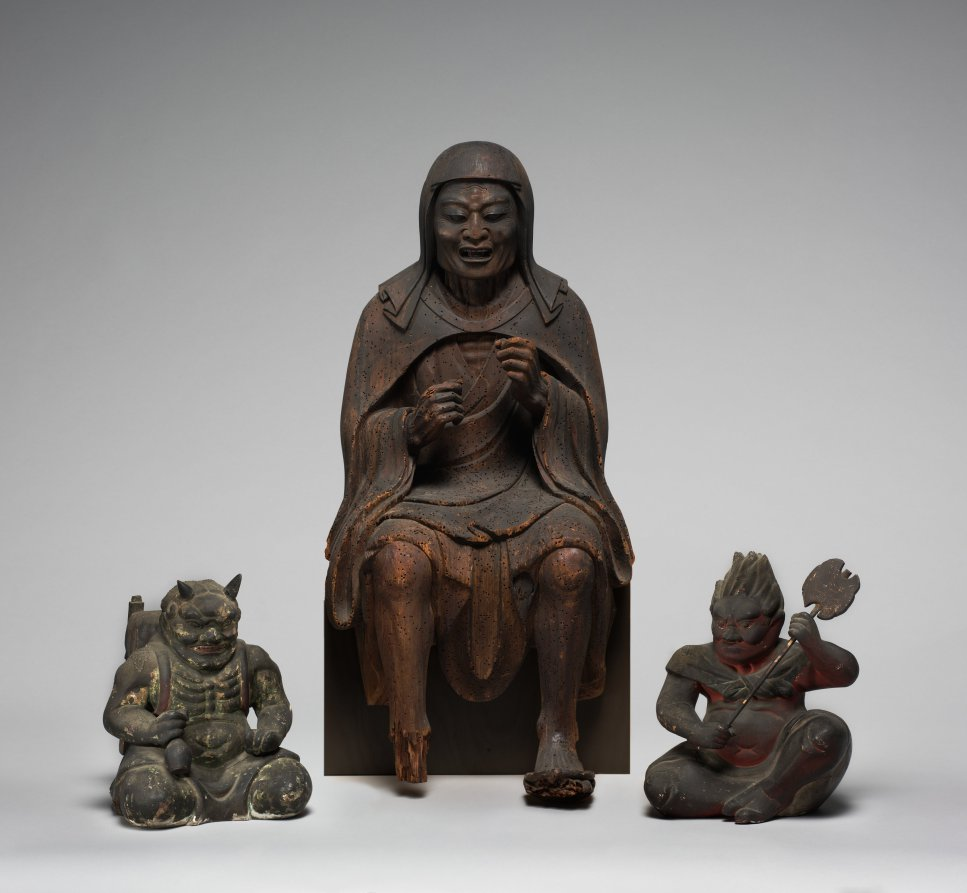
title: Seated Zenki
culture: Japan, Muromachi period (1392–1573)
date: 1400s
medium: wood with pigment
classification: Sculpture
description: The axe-wielding red Zenki, and the vase-holding, bamboo backpack-wearing green Koki are both under the mystical control of the monk, En no Ozunu (legendarily 634–701), also known as En no Gyōja, or “En the Ascetic,” considered to have founded Shugendō, a style of religious practice focused on performing austerities in mountainous settings.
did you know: A popular Japanese comic named Zenki was inspired by the figure seen here wielding a weapon.